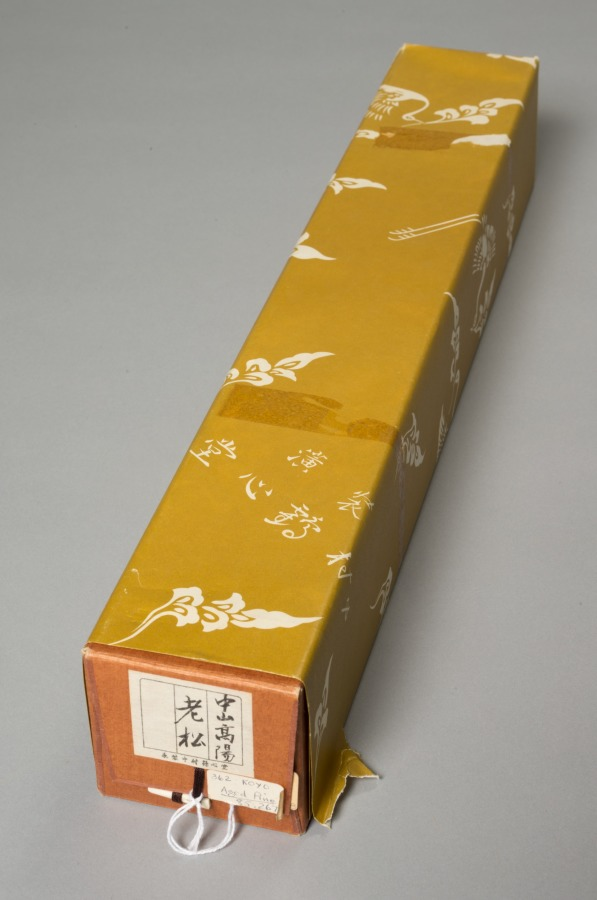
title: Aged Pine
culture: Japan, Edo period (1615–1868)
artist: Nakayama Kōyō (Japanese, 1717–1780)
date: 1717–80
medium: hanging scroll; ink on paper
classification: Painting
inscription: Artist's inscription and seal, lower right.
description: The ancient pine is an admired subject in Asian painting and symbolizes the desirable human qualities of wisdom and solid moral character.